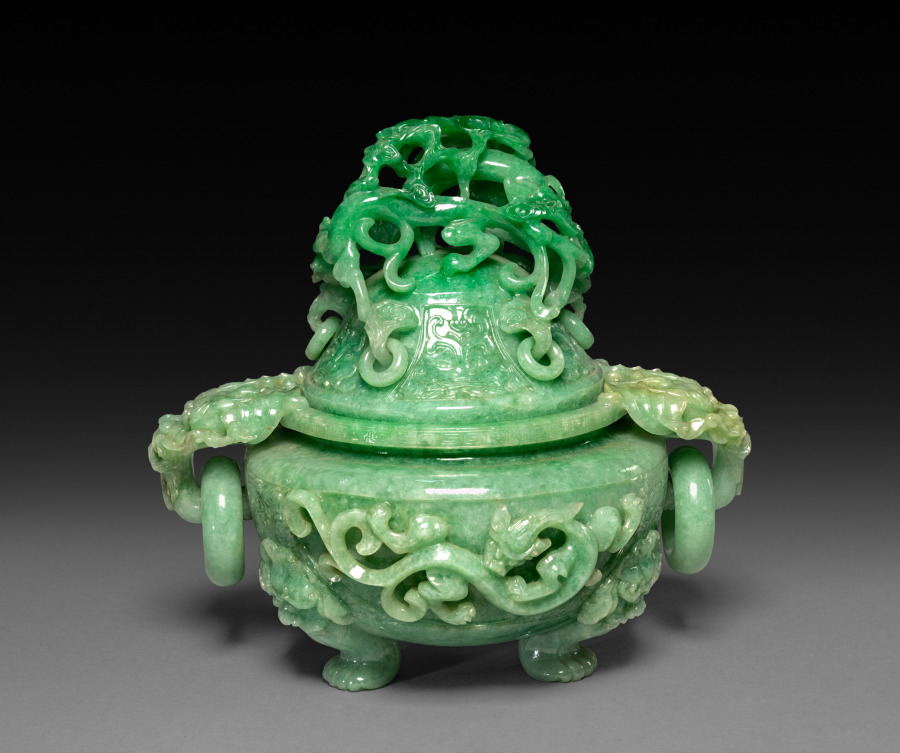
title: Three-Sectional Altar Group: Koro with Lid and Base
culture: China, Qing dynasty (1644-1911)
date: 1644–1911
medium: jade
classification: Jade